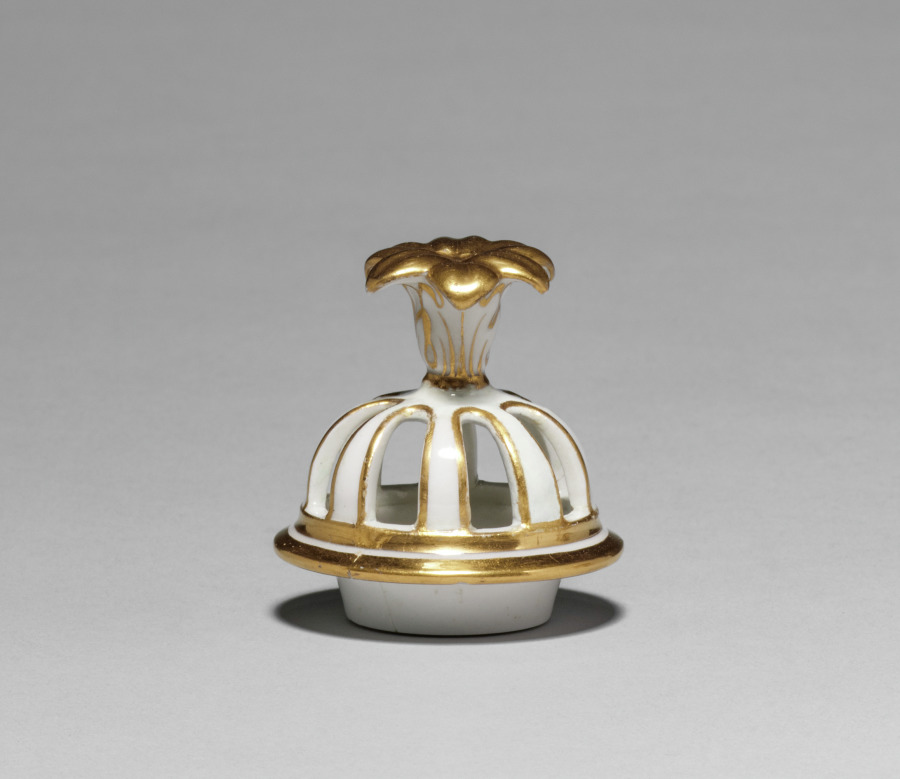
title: Urn (cover)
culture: England, Worcester, 19th century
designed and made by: Flight, Barr and Barr (British)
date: c. 1815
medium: artificial porcelain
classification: Ceramic